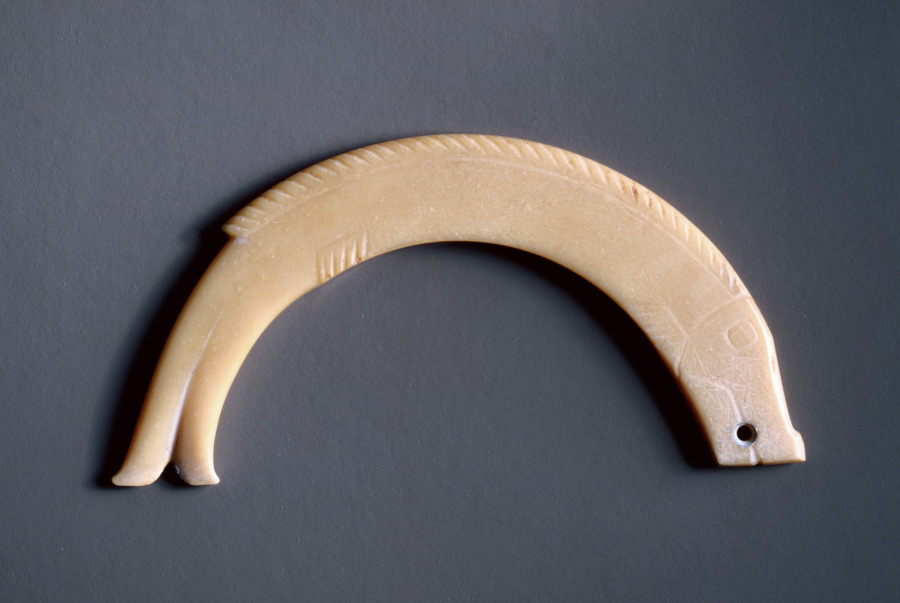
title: Arc-Shaped Jade Fish Pendant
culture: China, Western Zhou dynasty (c. 1046–771 BCE)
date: c. 1050–900 BCE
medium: nephrite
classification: Jade